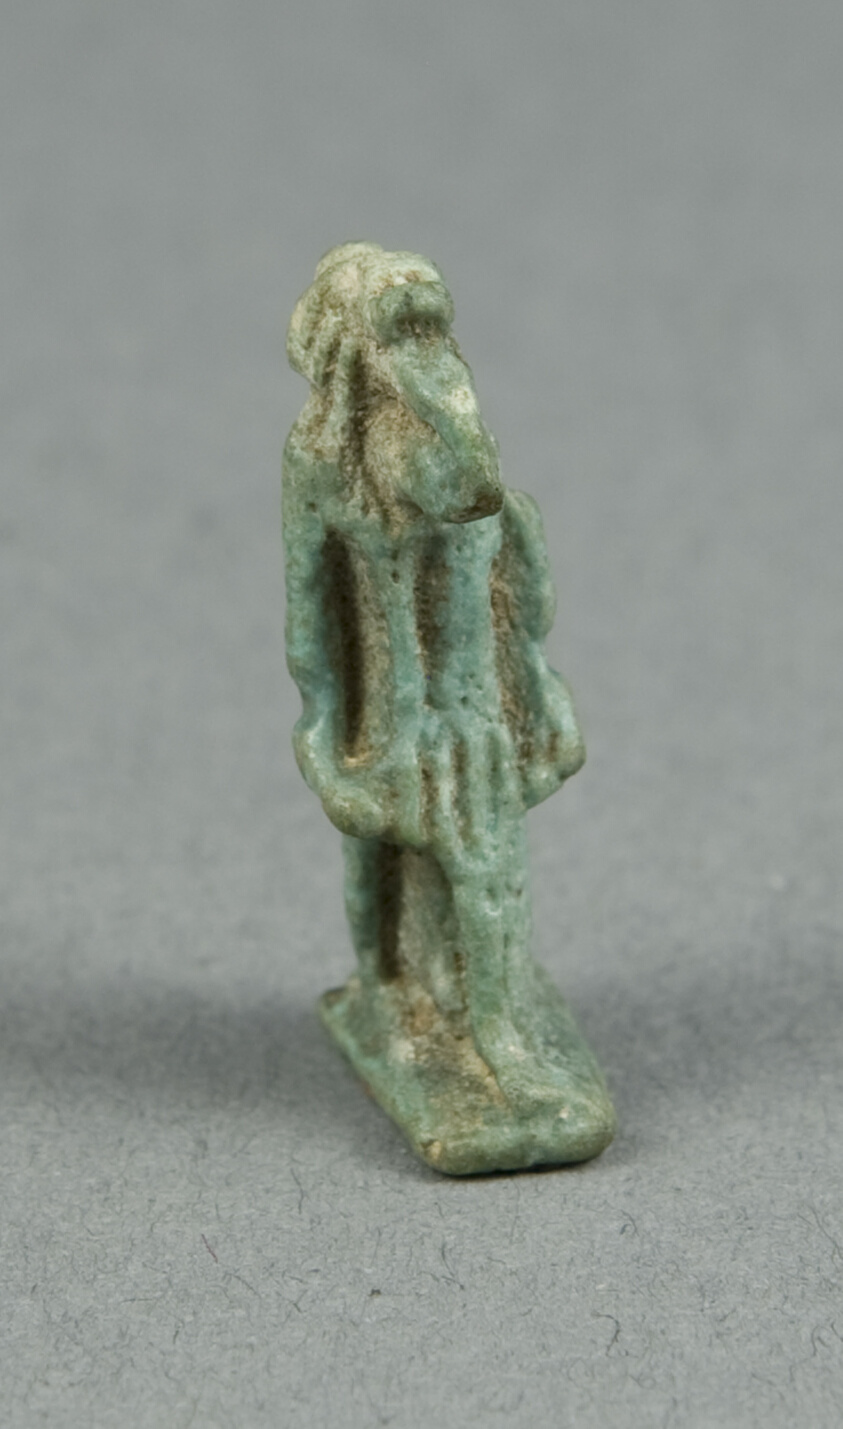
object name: Costume and Accessories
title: Amulet of the God Thoth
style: egyptian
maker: Egyptian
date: Late Period, Dynasties 26–31 (664–332 BCE)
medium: Faience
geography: Egypt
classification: amulet; jewelry; ceramics; ancient art; costume; faïence (composite material)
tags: gods (deities)